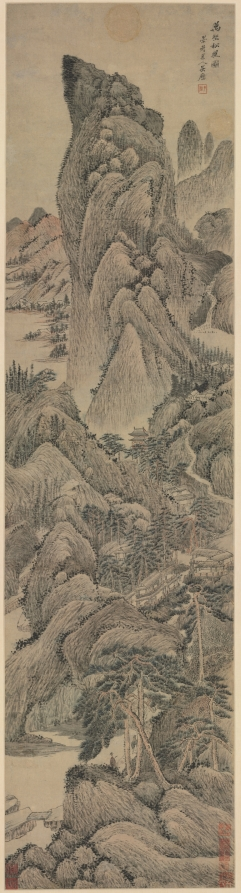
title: Pine Wind from Myriad Villages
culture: China, Qing dynasty (1644-1911)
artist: Wu Li (Chinese, 1632–1718)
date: late 1600s–1718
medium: Hanging scroll; ink and light color on paper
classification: Painting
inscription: Artist's title, signature, and 2 seals: Pine Wind from Myriad Valleys. Mojing daoren Wu Li.[seals] Mojing daoren; Wu Li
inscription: 5 additional seals: 2 of Fang Guancheng 方觀承 (1698–1768); 1 of Ma Chi-tso (1900s); 2 unidentified.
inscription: Two seals of the Qianlong emperor [r. 1736–95], probably authentic, were believed spurious and removed by a previous owner.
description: Wu Li, a native of Jiangsu province, was a talented painter, poet, and calligrapher. He studied painting with Wang Jian (1598–1677) and Wang Shimin (1592–1680), two of the “Four Wangs,” leaders of the Orthodox school of painting in the early Qing period. Through them, he also absorbed styles of earlier Ming dynasty masters. Wu was highly praised by his contemporaries and his paintings were in demand, but his interest in philosophy and religion curtailed his painting activities later in life. Wu Li converted to Christianity and in 1688 was ordained as one of the first 3 Chinese Jesuit priests. He spent the final 30 years of his life primarily in missionary work with the poor. Although this painting is undated, the sooty blackness of the ink tones and the easy self-confidence with which they are set down on paper echo recognized late works.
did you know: A figure carrying a qin, zither, walks between the buildings, perhaps intending to play music for the two men seated beneath the pines.